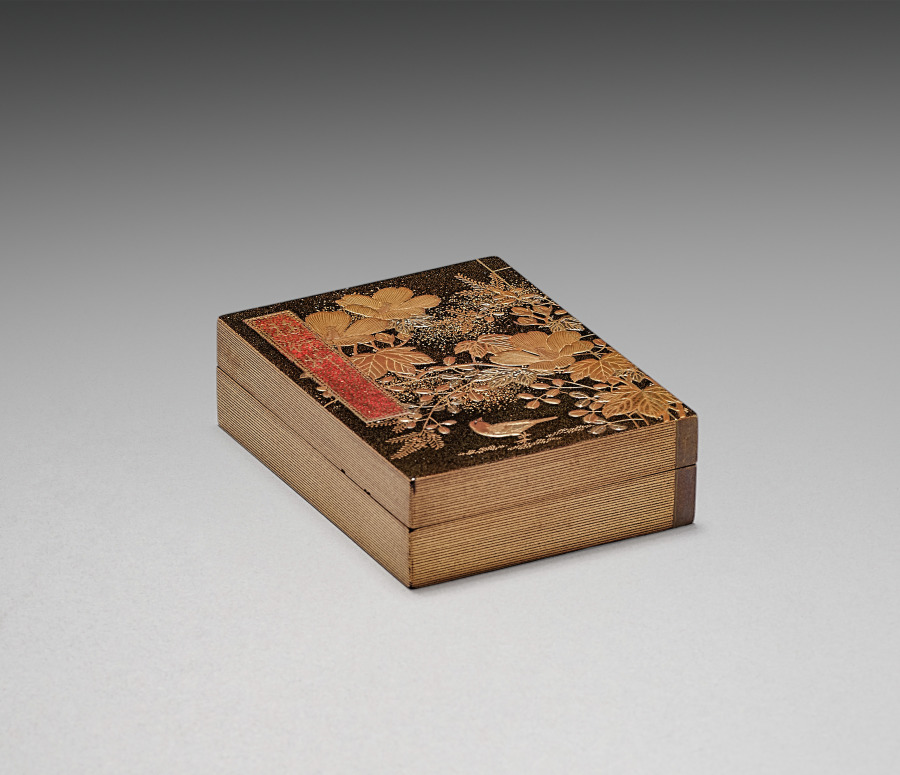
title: Nested Boxes with Chrysanthemums (inner box)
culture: Japan, Meiji period (1868–1912)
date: early 1900s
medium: lacquer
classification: Lacquer